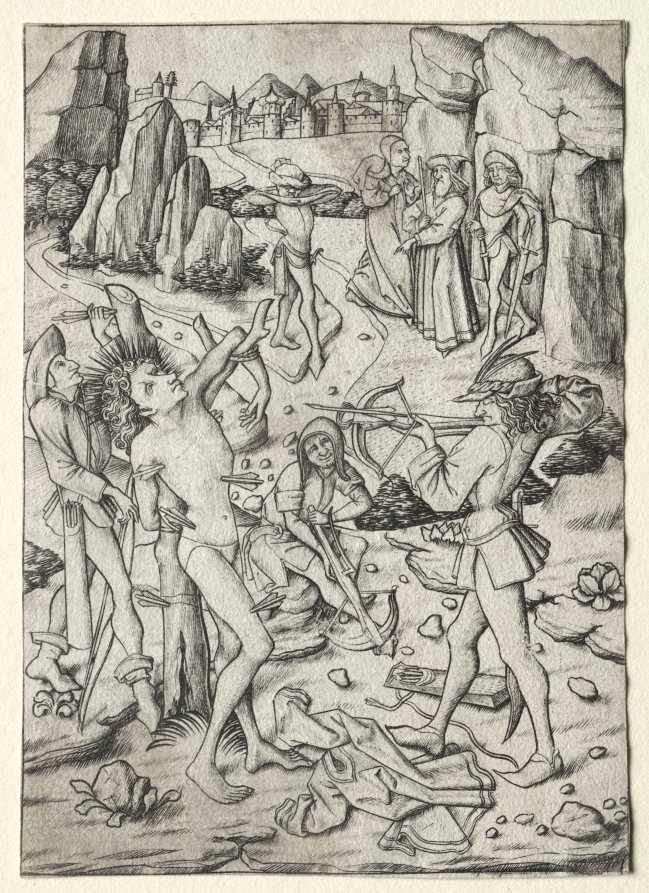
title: The Martyrdom of St. Sebastian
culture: Germany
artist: Master ES (German, active 1450–67)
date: 1450–67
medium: engraving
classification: Print